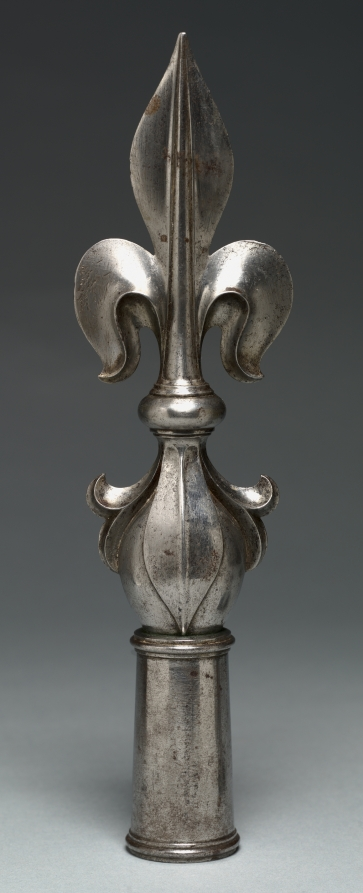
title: Banner Head in the Form of a Fleur-de-lys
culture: France, 18th century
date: 1700s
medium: steel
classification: Arms and Armor